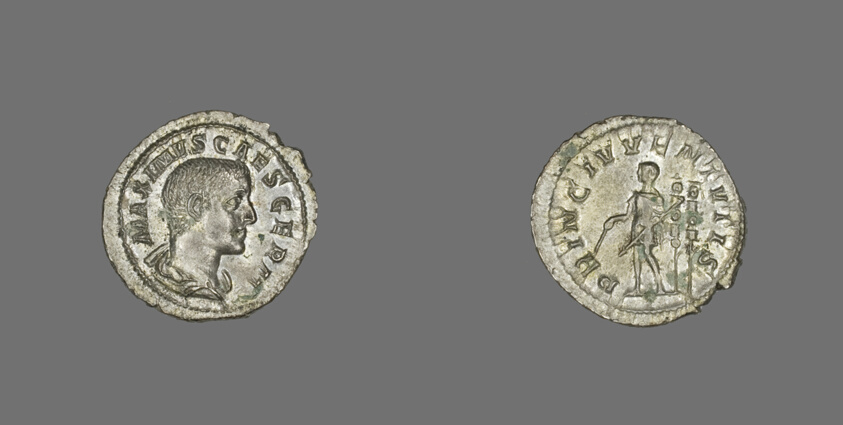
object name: Coin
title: Denarius (Coin) Portraying the Emperor Maximus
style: roman (ancient, style or period), ancient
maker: Roman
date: late 235-early 236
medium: Silver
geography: Rome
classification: coin; struck; ancient art